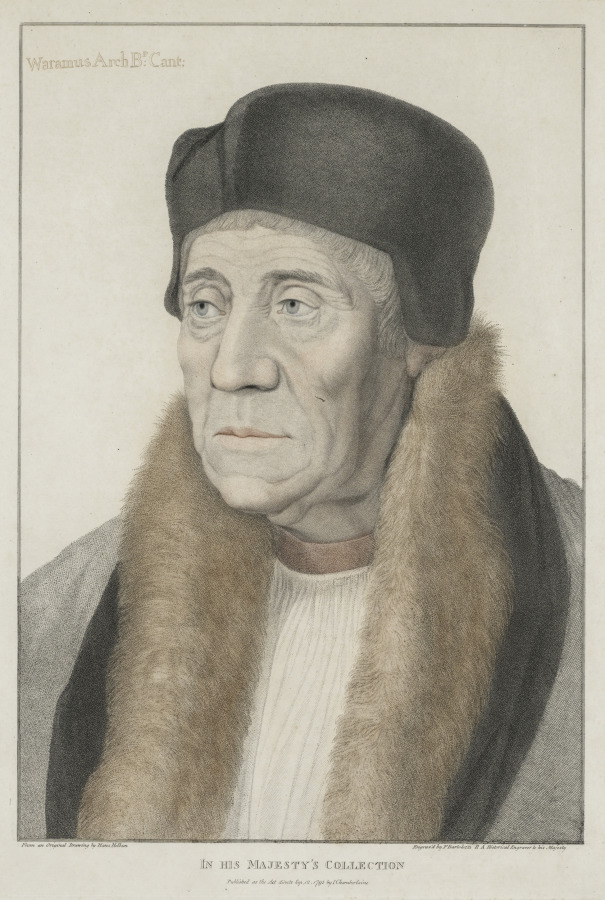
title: Waramus Arch Bishop of Canterbury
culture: England, 18th century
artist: Francesco Bartolozzi (British, 1727–1815)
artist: after Hans Holbein (German, c. 1465–1524)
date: 1795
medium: Color stipple engraving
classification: Print